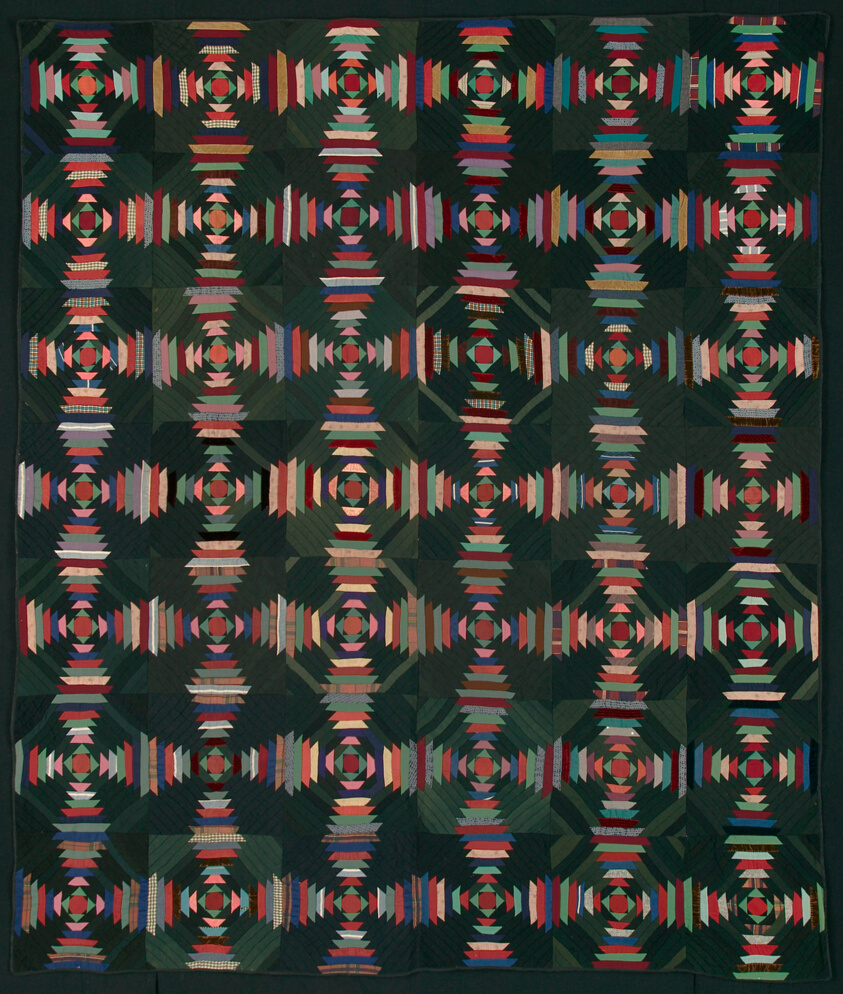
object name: Textile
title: Bedcover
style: amish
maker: United States, Indiana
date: 1880s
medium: Wool, cotton, silk and wild silk, plain, twill, float and plain weave derived float weaves; some with supplementary pile warps forming cut velvet, some with supplementary patterning warps; and some self-patterned by main warp and ground weft floats; some fulled; some embroidered with silk in satin stitches; pieced; back with cotton, plain weave; roller printed; quilting knots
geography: Indiana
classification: needlework - quilt; textile